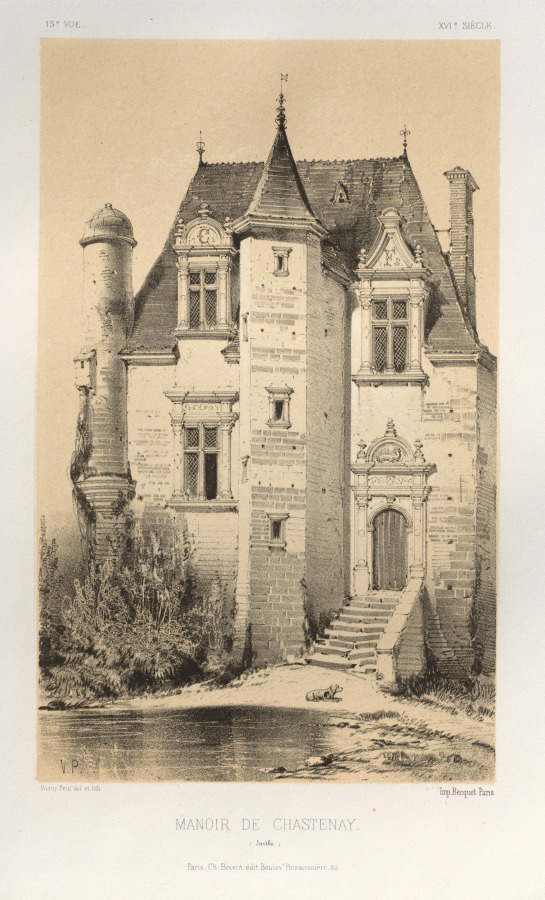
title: Architecture Pittoresque ou Monuments des xveme. Et xvieme. Siecles: Chateaux De France des XV et XVI Siecles: Pl.15, Manoir De Chastenay (Sarthe)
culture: France, 19th century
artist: Victor Petit (French, 1817–1874)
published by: Charles Boivin (publisher and editor); Lith de Godard a Paris (printer)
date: 1860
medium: lithograph with tint stone, from portfolio of 100 lithographs with tint stone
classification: Print